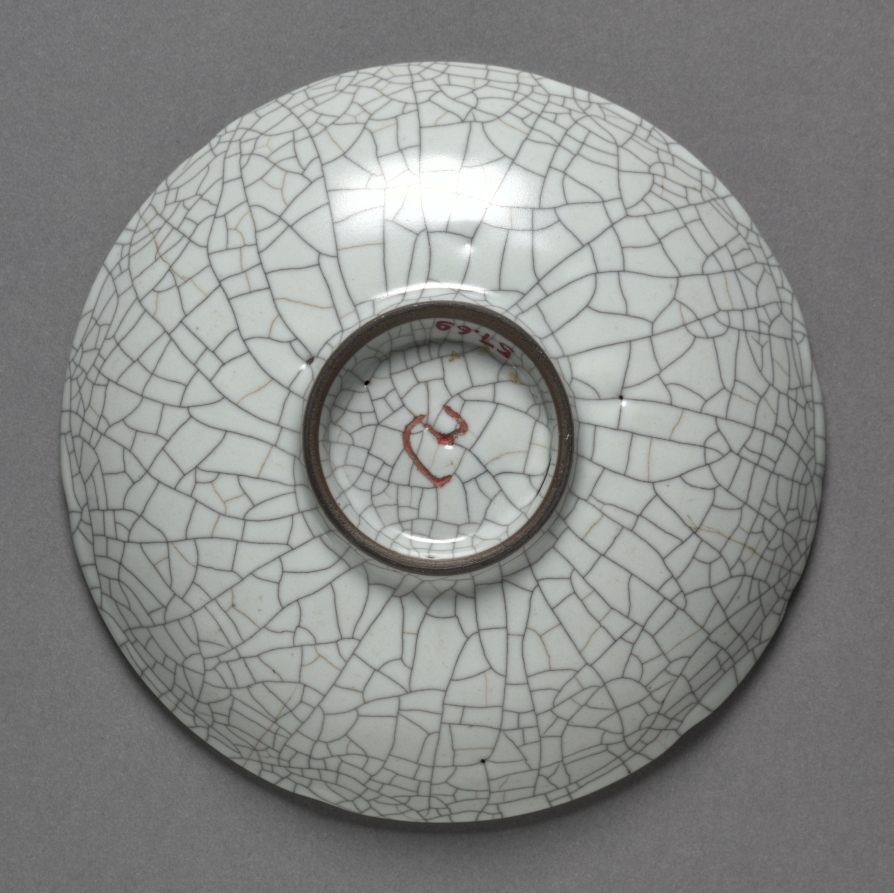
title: Flat Dish: Guan ware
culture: China, Song dynasty (960-1279)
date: 960–1279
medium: glazed reddish-brown stoneware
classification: Ceramic